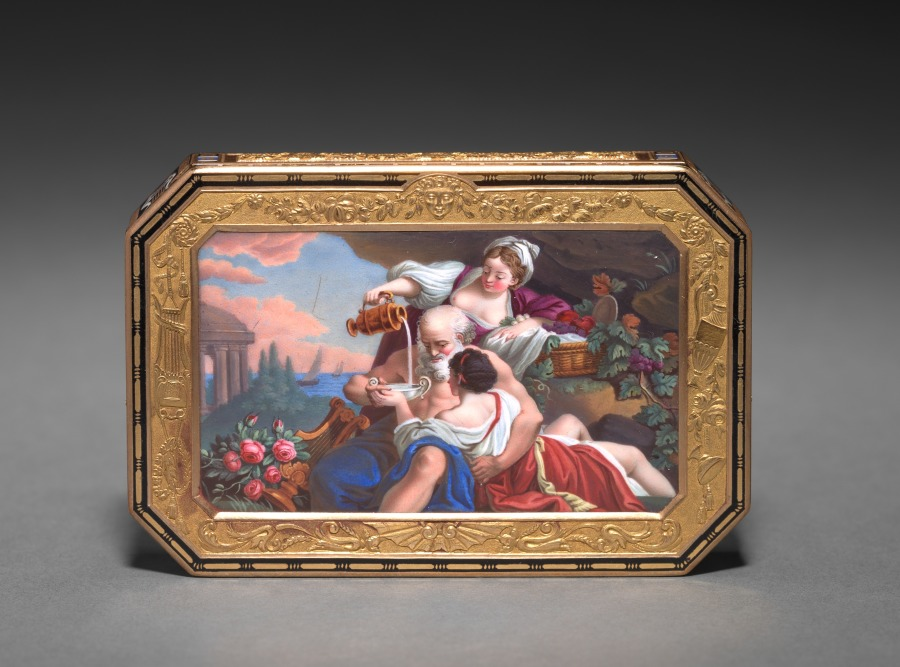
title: Box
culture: Switzerland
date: early 1800s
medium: gold and enamel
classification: Enamel